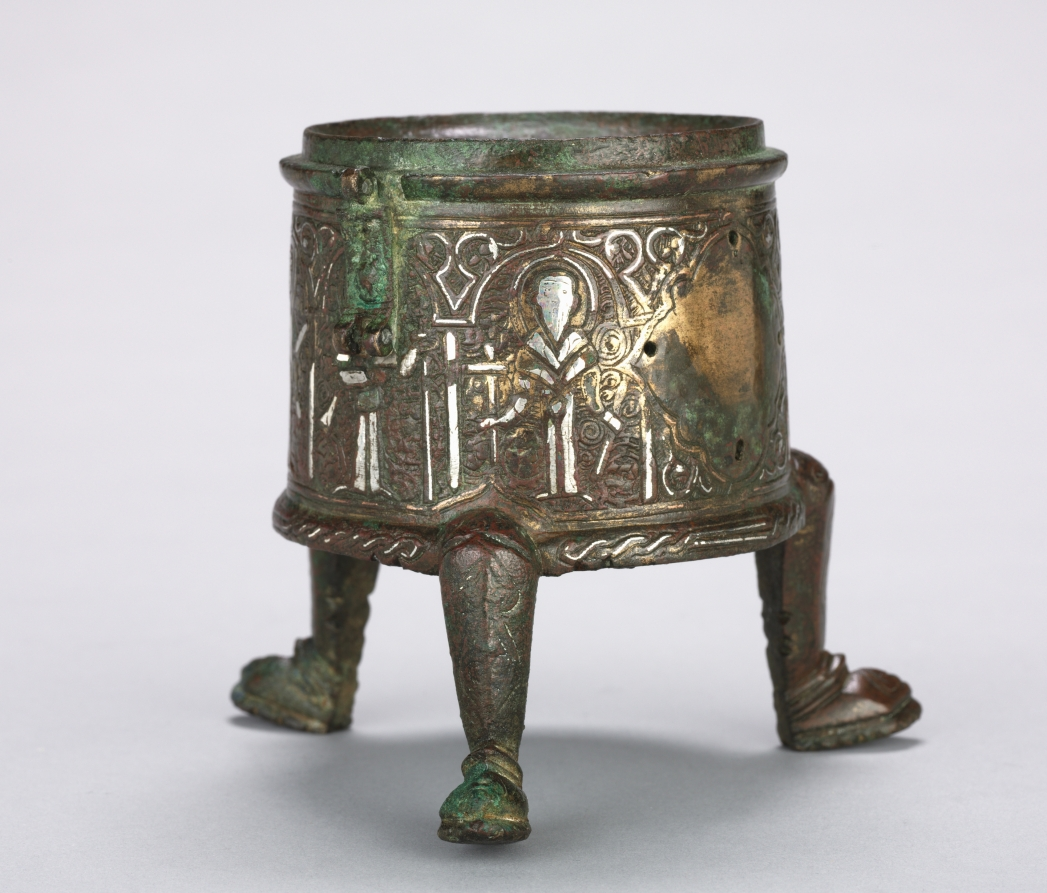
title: Incense Burner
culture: Syria, Ayyubid Period, 13th Century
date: 1200–1250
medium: brass inlaid with silver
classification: Metalwork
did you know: This footed vessel is wearing shoes.